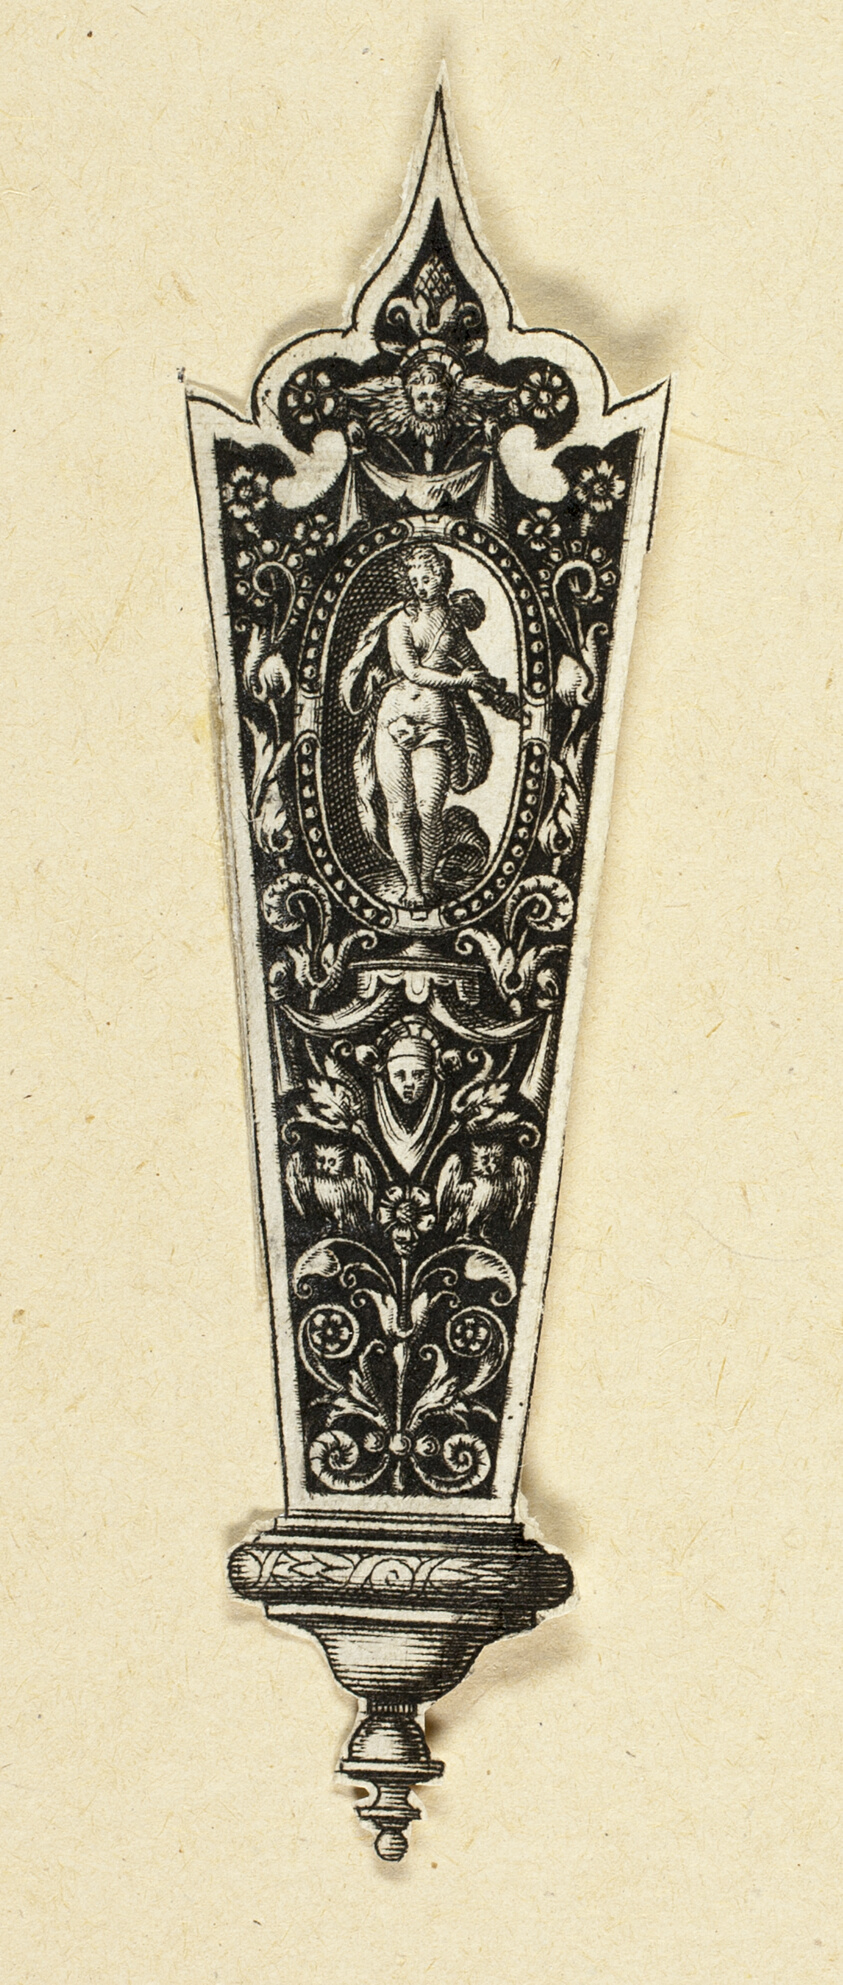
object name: Print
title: Knife Handle (Lucretia)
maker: Theodor de Bry (Flemish, 1538–1598)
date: c. 1588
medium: Engraving in black on ivory laid paper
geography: Flanders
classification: engraving; paper; print; prints and drawing